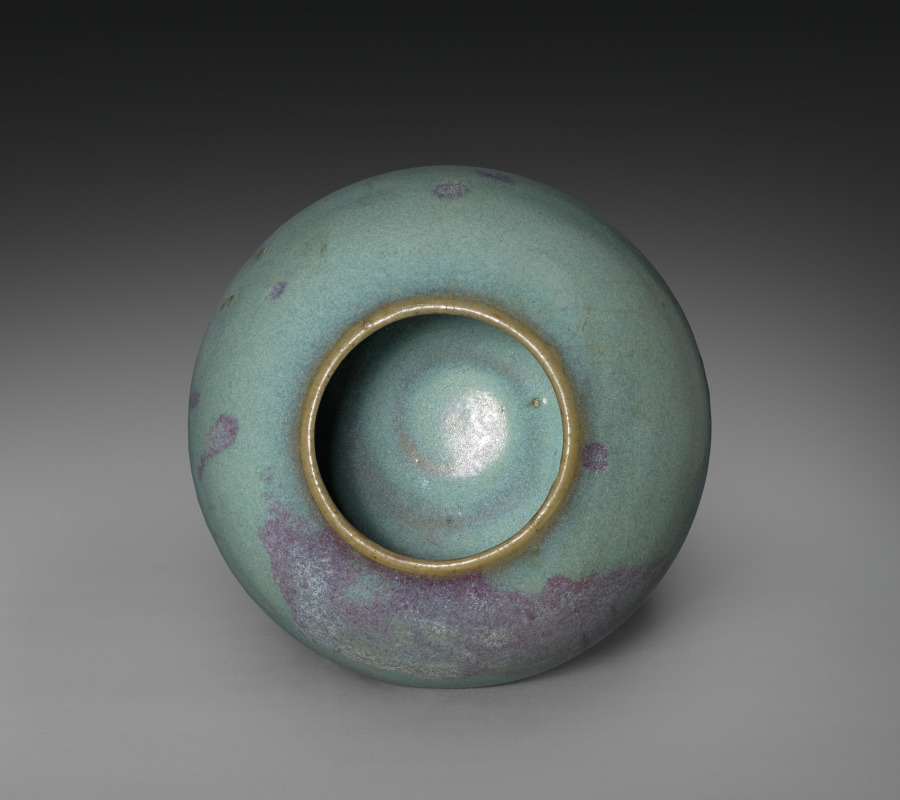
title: Jar with Cover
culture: China, Henan province, Yuxian, Northern Song dynasty (960-1127) or Jin dynasty (1115-1234)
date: 1100s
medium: porcelaneous stoneware with blue glaze and splashes of purple, Jun ware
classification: Ceramic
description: The beauty of Jun ware lies in its spectacular glaze effects, which provide immediate visual appeal. The glaze that is thickly applied onto the heavily potted body also lends the vessel a sense of volume. As shown here, its glaze colors range from soft milky-blue to rose-purple. The purple suffusions are created by splashing or brushing copper-rich pigments onto the glaze before firing. The merging of purple splashes with opalescent blue glaze displays rich tonal variations, resembling purplish glows at sunset.